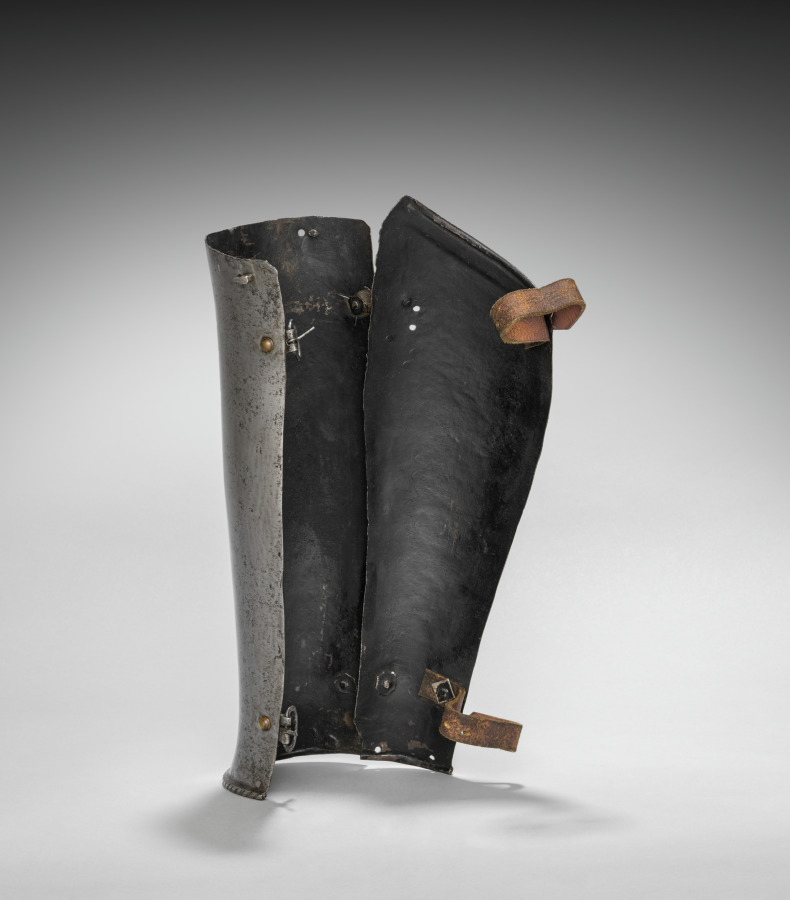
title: Proper Right Greave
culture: South Germany, 16th century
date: c. 1560–1580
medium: steel, leather straps, brass rivets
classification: Arms and Armor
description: This armor was developed for the joust-a sporting combat between two mounted contestants. Although all of the elements of this armor date from the same period, they are not all from the same suit. This armor is thus called "composed." It also shows the asymmetry of jousting armor. The participants rode along a wall-like barrier known as a "tilt" with their left sides facing one another. Consequently, armor on that side of the body had to be thicker. Note the large plate (grandguard) over the left shoulder for extra protection. Also, the breathing holes in the helmet were placed on the right side (farthest from an opponent's lance) to avoid injuries from splinters. The bracket attached to the right breastplate is called the lance-rest, a shock-absorbing support designed to accommodate the lance when "couched" under the right armpit.